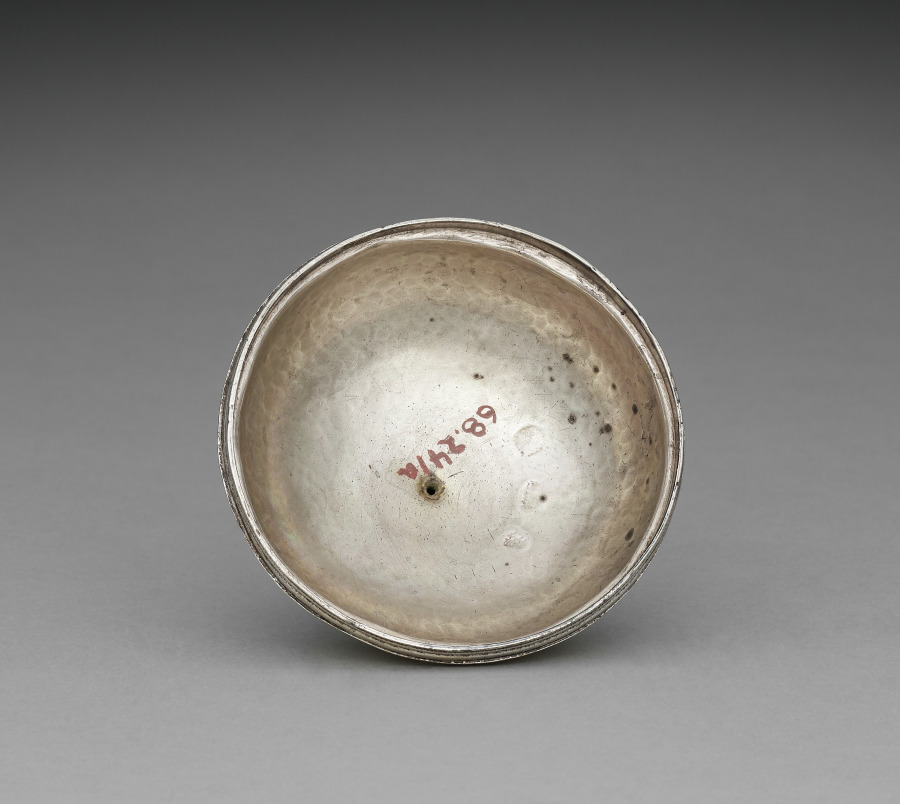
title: Cover for a Standing Cup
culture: London, England, late 16th century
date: 1593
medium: silver, partially gilt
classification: Silver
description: Produced during the last years of the Tudor dynasty (1485–1603), this lid and the accompanying vessel exemplify the symmetrical patterns, horizontal designs, and clear division of space typical of English silverwork at the time. The functional shape and ornamental designs characteristic of standing cups made them ideal for ceremonial occasions.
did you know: This is the lid to a standing cup. See cover record.